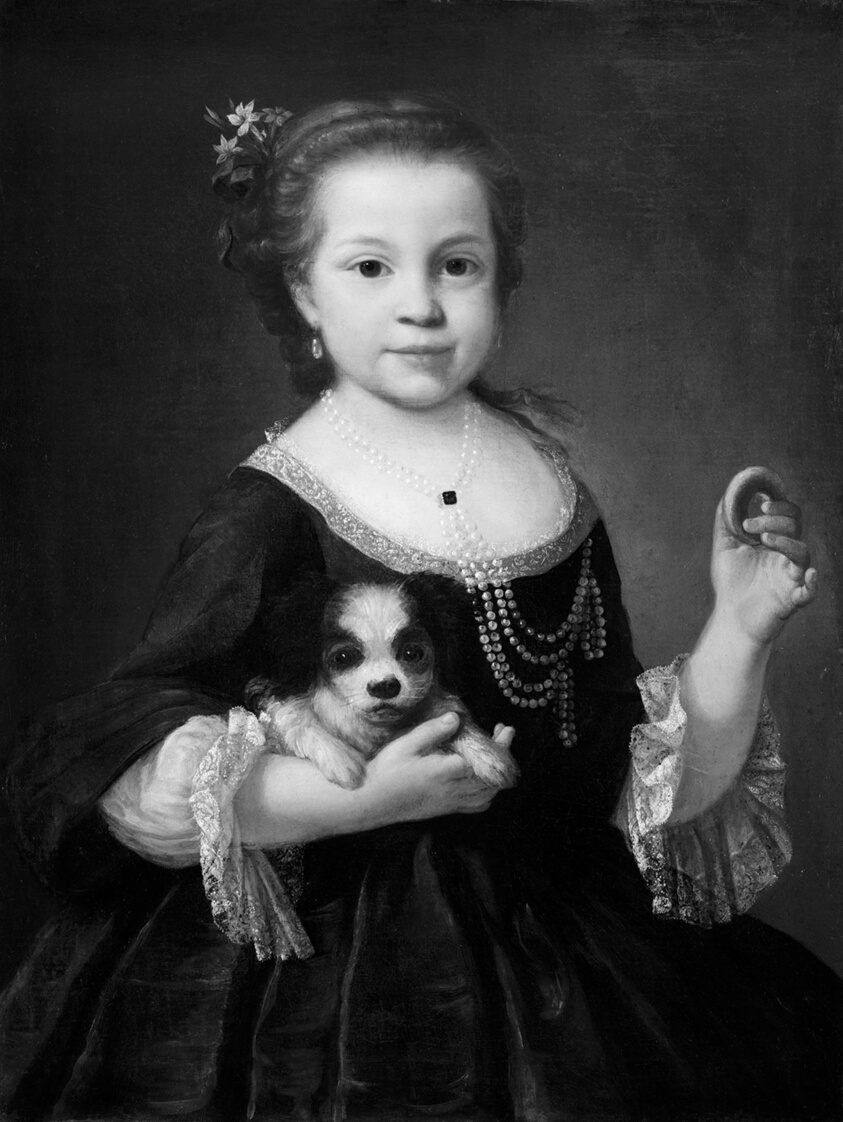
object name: Painting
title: Portrait of a Girl with a Dog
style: 18th Century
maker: Attributed to Alessandro Longhi (Italian, 1733–1813)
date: c. 1740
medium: Oil on canvas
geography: Rome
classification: painting; portrait; paint; Italian; oil on canvas; oil paintings (visual works); european painting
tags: children, dog, flowers, girl, jewelry, lace, pearls, portrait, portraits, portraits: child subject